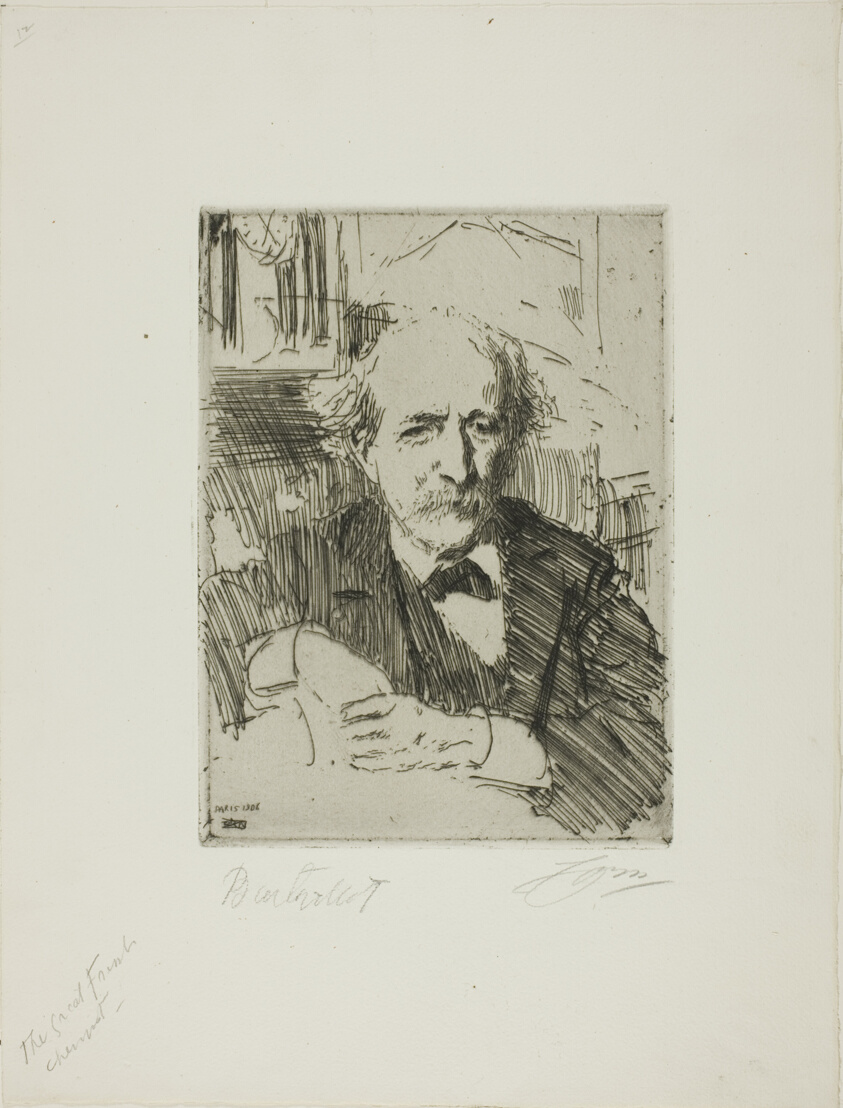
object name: Print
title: Marcellin Berthelot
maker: Anders Zorn (Swedish, 1860-1920)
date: 1906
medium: Etching on ivory laid paper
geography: Sweden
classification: etching; print; prints and drawing